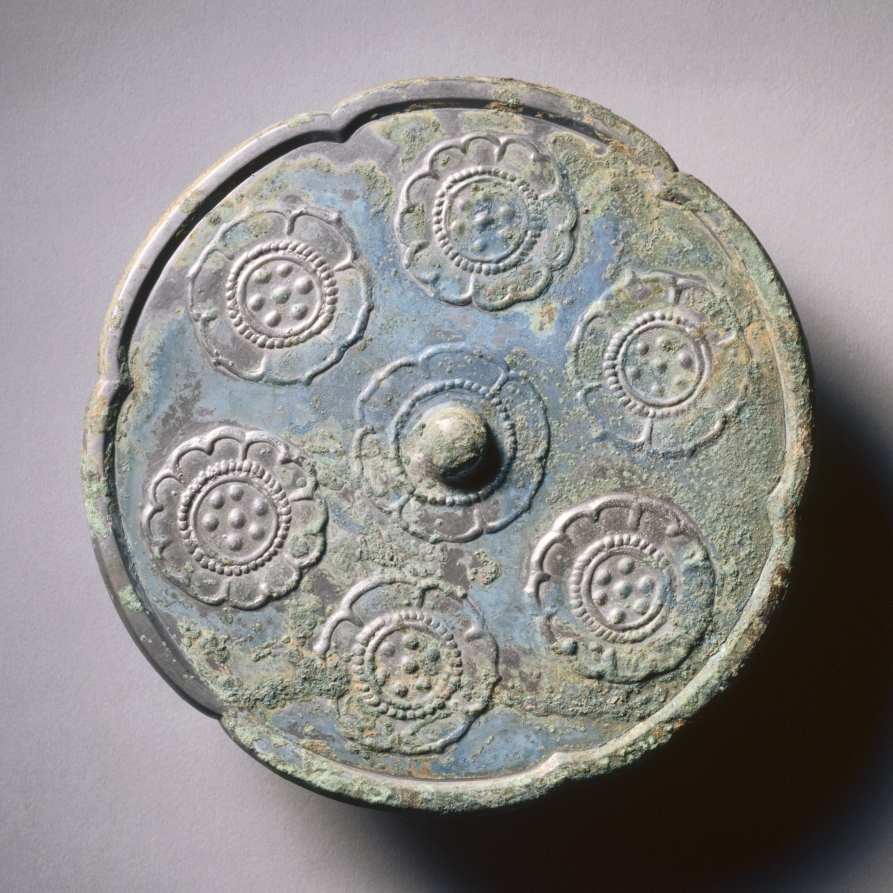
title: Lobed Mirror with Six Blossoms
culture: China, Tang dynasty (618-907)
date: mid-600s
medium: bronze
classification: Metalwork